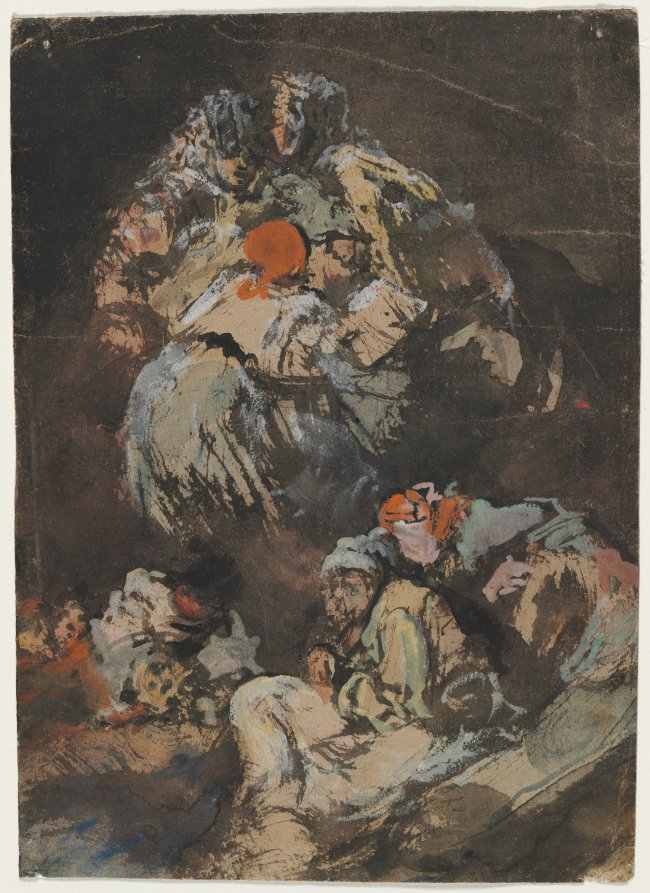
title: Figures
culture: Spain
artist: Eugenio Lucas Velázquez (Spanish, 1817–1870)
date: 1850–60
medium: watercolor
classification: Drawing